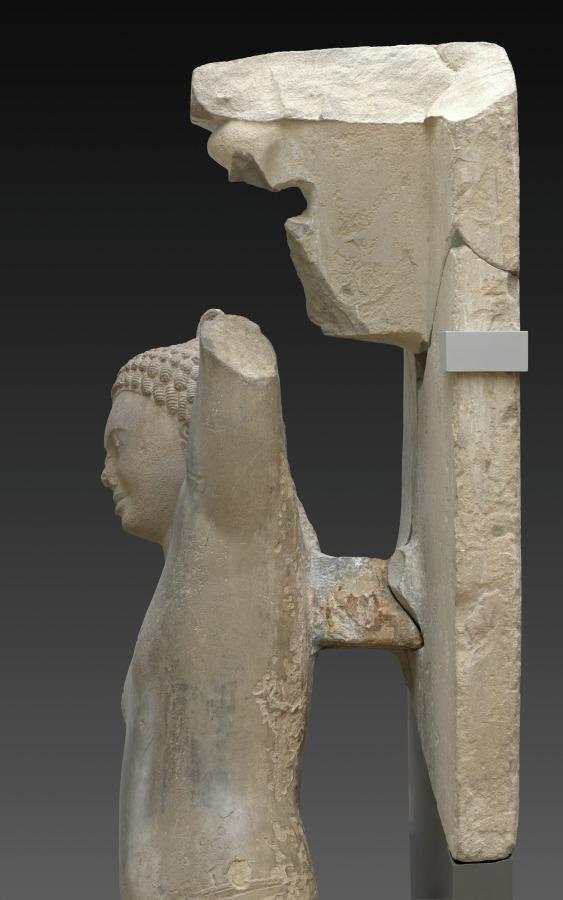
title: Krishna Lifting Mount Govardhan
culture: Southern Cambodia, Takeo Province, Phnom Da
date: c. 600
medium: Sandstone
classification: Sculpture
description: This masterwork of early Cambodian sculpture shows the Hindu god Krishna effortlessly holding aloft a mountain to protect his fellow villagers and herds from torrential storms sent by a jealous old god. It is one of eight monumental monolithic figures recovered from a two-peaked mountain in the floodplains of the Mekong River delta, on the outskirts of the ancient urban center of Angkor Borei.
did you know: Gold earrings were once fastened to the sculpture using holes in the figure's earlobes.